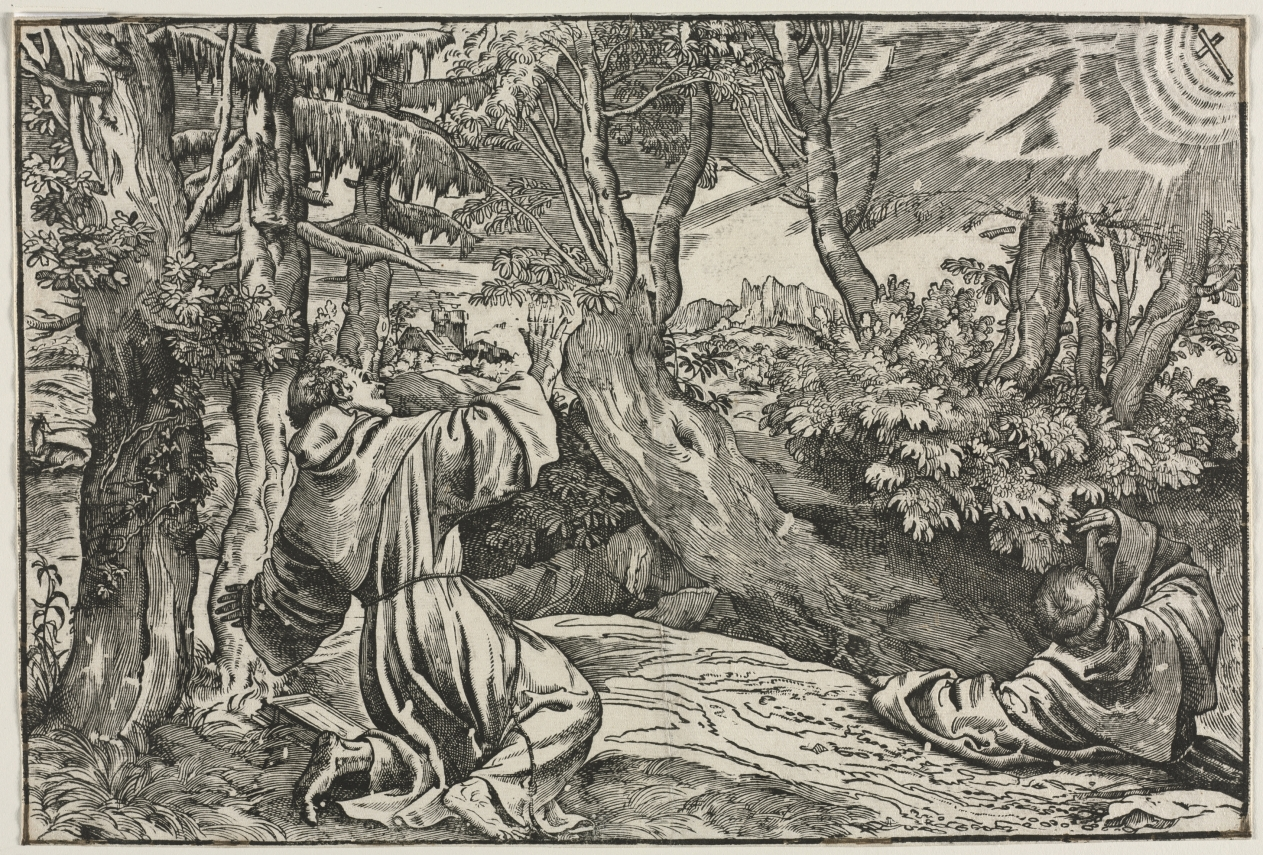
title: Saint Francis Receiving the Stigmata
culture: Italy, Venice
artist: Niccolo Boldrini (Italian, c. 1500–after 1566)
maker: after Titian (Italian, c. 1488–1576)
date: 1535–45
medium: woodcut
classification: Print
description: In this woodland setting, the trees yield to the divine presence, which travels from the upper right sunburst through the forest, like a heavenly explosion, toward the figure of Saint Francis at left. Landscape was central to the story of the saint, who, Christian tradition says, spent years in the wilderness living as a beggar before he miraculously received the stigmata (wounds of Christ) during an ecstatic vision. Titian’s dramatic lines create a series of dynamic diagonals, heightening the moment of religious rapture and expressing God’s power through the wonderous riches of nature.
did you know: The woodcutter cut the block to purposely imitate the drawing style of the composition's designer, Titian.